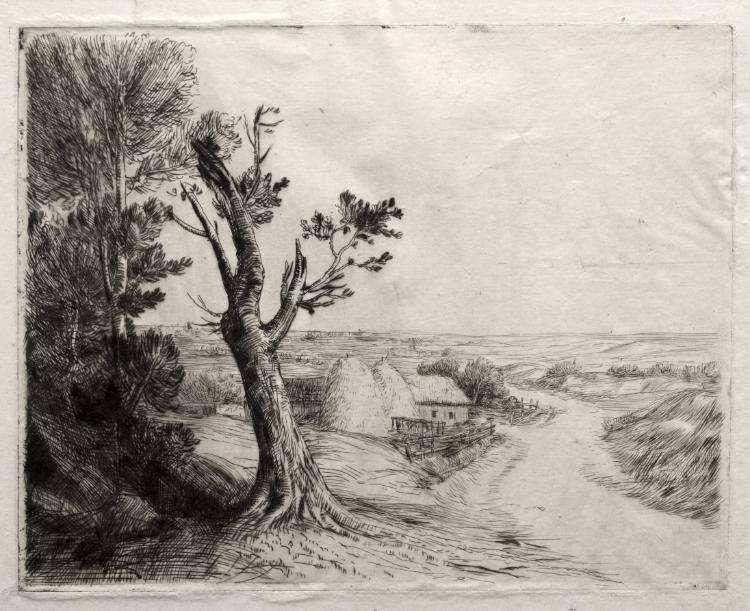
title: Landscape with Strawstacks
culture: France, 19th century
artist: Alphonse Legros (French, 1837–1911)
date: c. 1857–1911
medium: etching and drypoint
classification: Print